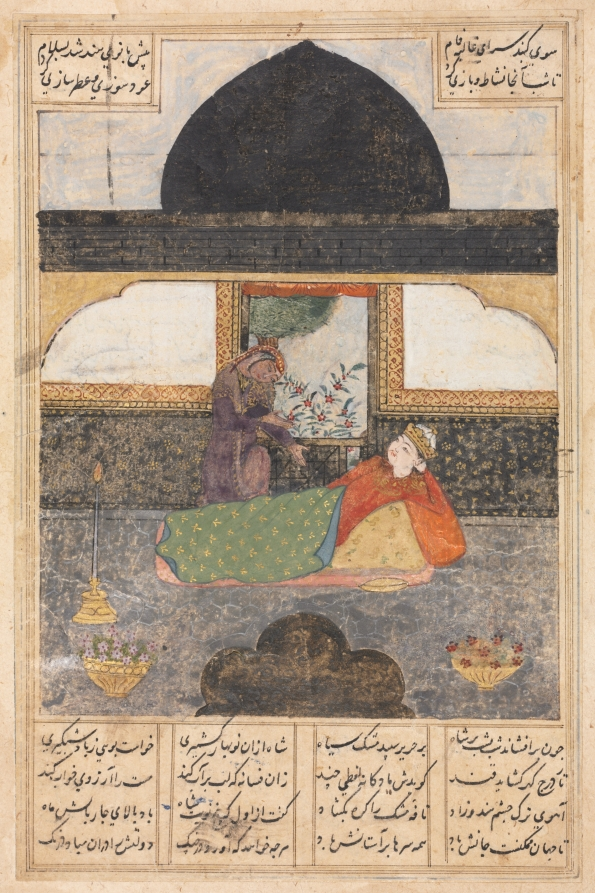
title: Bahram Gur Visits the Princess of India in the Black Pavilion (recto): Illustration and Text, Persian Verses, from a manuscript of the Khamsa of Nizami, Haft Paykar [Seven Portraits]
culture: Iran, possibly Tabriz or Shiraz, Timurid Period, early 15th century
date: c. 1400–1410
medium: opaque watercolor and ink on paper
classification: Manuscript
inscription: script: Nasta'liq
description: The Khamsa, a suite of five poems written by Nizami in the 12th century, recounts the history and legends of pre-Islamic Iran with an emphasis on love rather than war. Here, in an early extant depiction of a favorite story, Shah Bahram Gur visits a princess in a black pavilion; this is one of seven paintings depicting the king visiting one of his seven wives, each in a different colored pavilion, on successive days of the week. The princess is shown telling a story after a day of lovemaking.